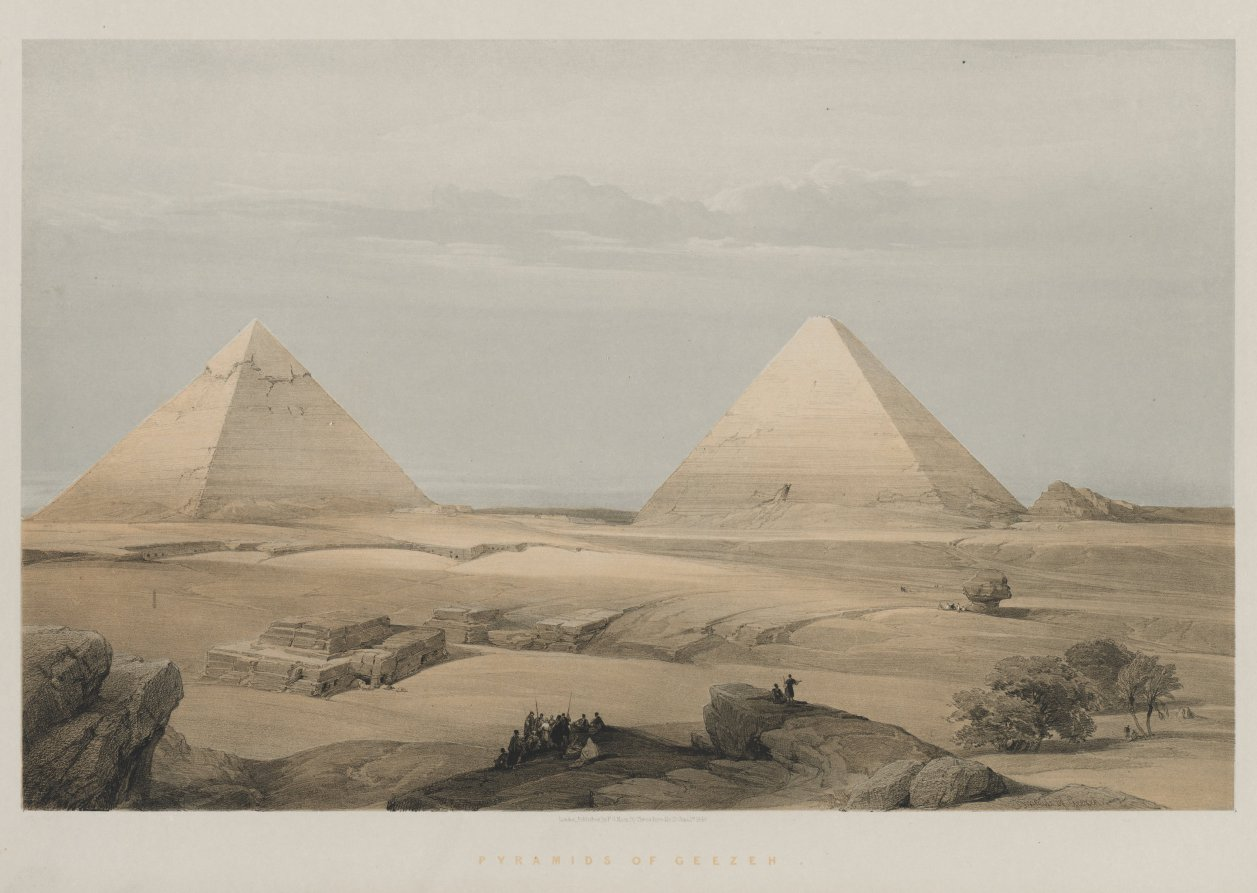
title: Egypt and Nubia, Volume II: Pyramids of Geezeh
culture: England, 19th century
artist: Louis Haghe (British, 1806–1885)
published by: F. G. Moon, 20 Threadneedle Street, London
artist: after David Roberts (Scottish, 1796–1864)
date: 1848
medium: color lithograph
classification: Print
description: Throughout the 1800s and into the 1900s, prints, paintings, and photographs, like Louis Haghe’s Egypt and Nubia series, brought back by artists who voyaged to Egypt, inspired American and European artists, architects, and designers to emulate ancient Egyptian motifs and styles. Egyptomania blossomed through the 1800s and can be seen in architecture around cities like Washington, DC, and in the interiors of aristocratic homes, as well as in funerary monuments, such as in Lake View Cemetery in Cleveland, Ohio. Looking back at these creations provides an interesting historical groundwork for debating who has the right to interpret Egyptian motifs and styles.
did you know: Louis Haghe was appointed Lithographer to the Queen in 1838.